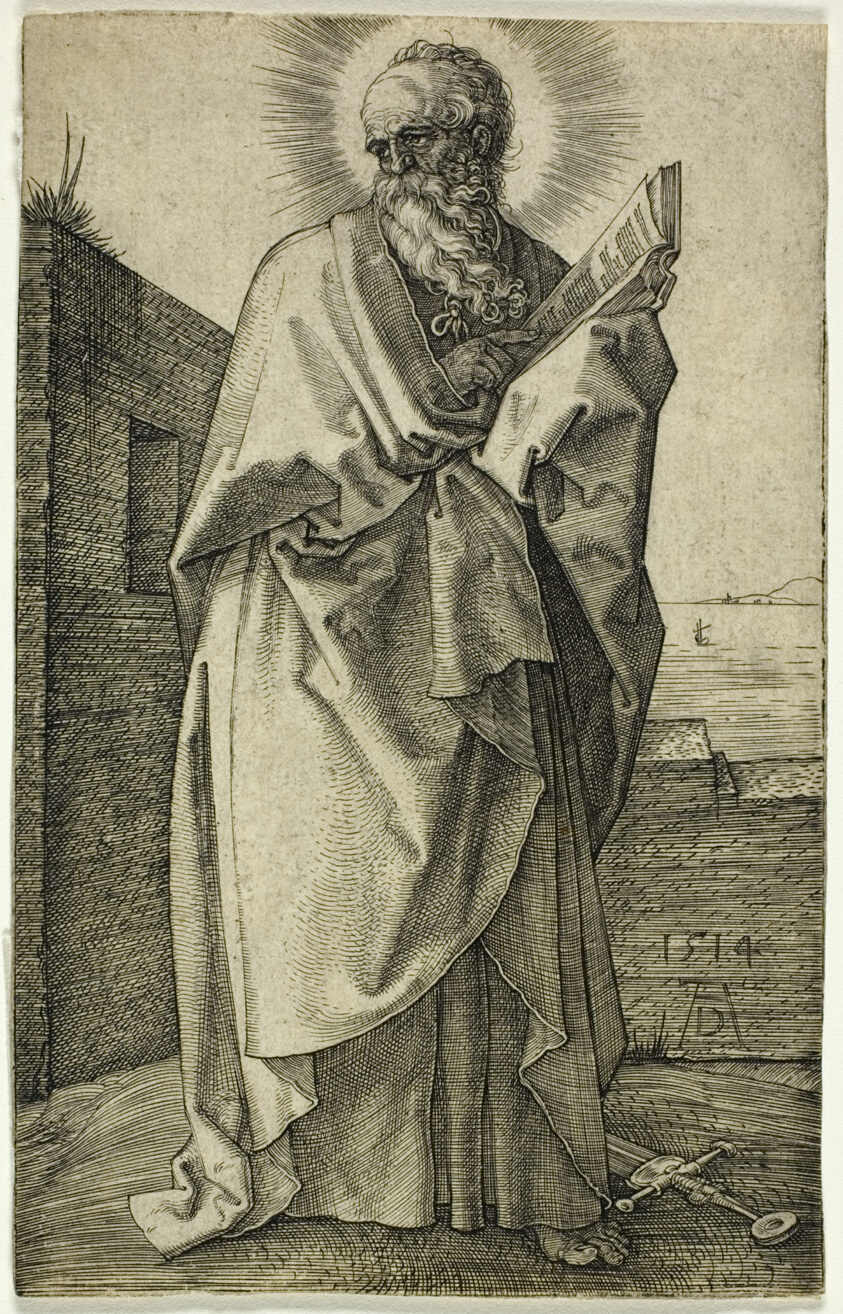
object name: Print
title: St. Paul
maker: Albrecht Dürer (German, 1471-1528)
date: 1514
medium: Engraving in black on ivory laid paper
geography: Germany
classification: engraving; print; prints and drawing; paper